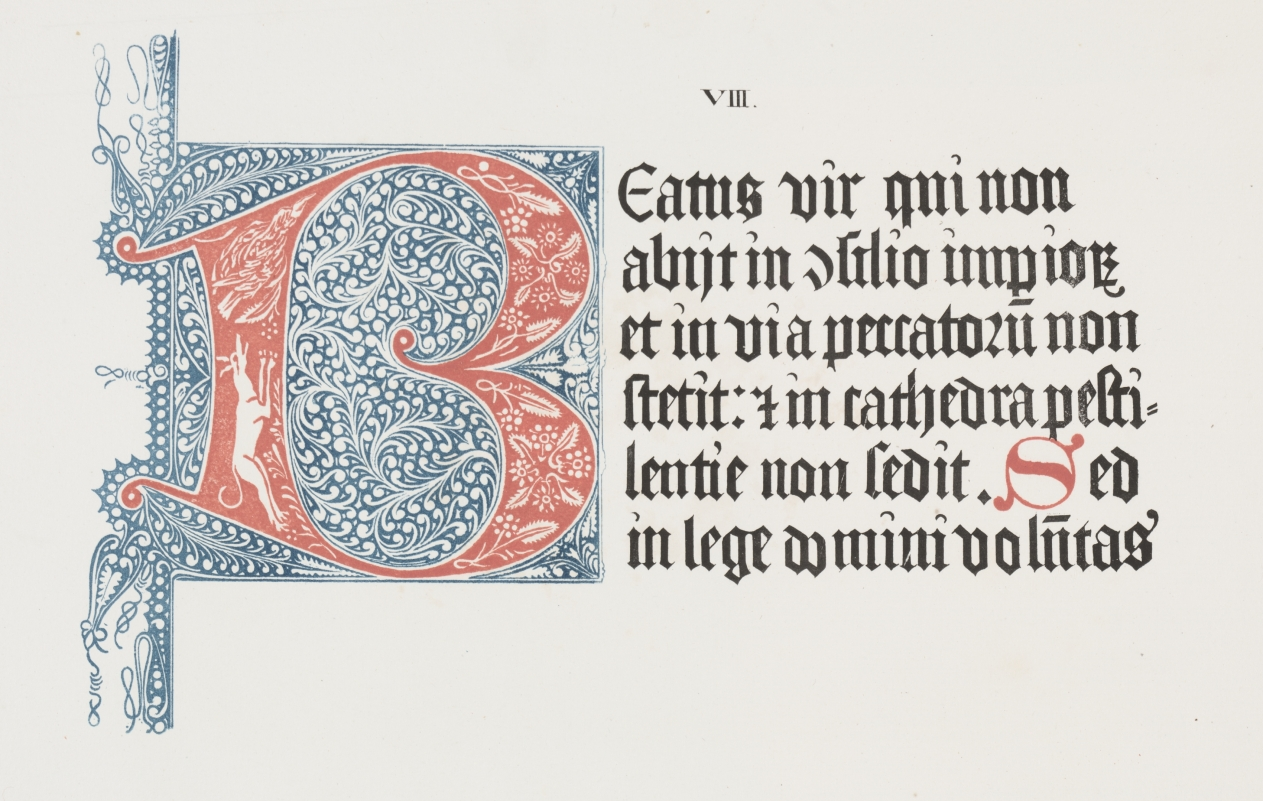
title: Art of the Lithograph: Psalter- Initial B, Plate VIII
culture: Germany, 19th century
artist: Alois Senefelder (German, 1771–1834)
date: 1818–1819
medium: color lithograph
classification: Print